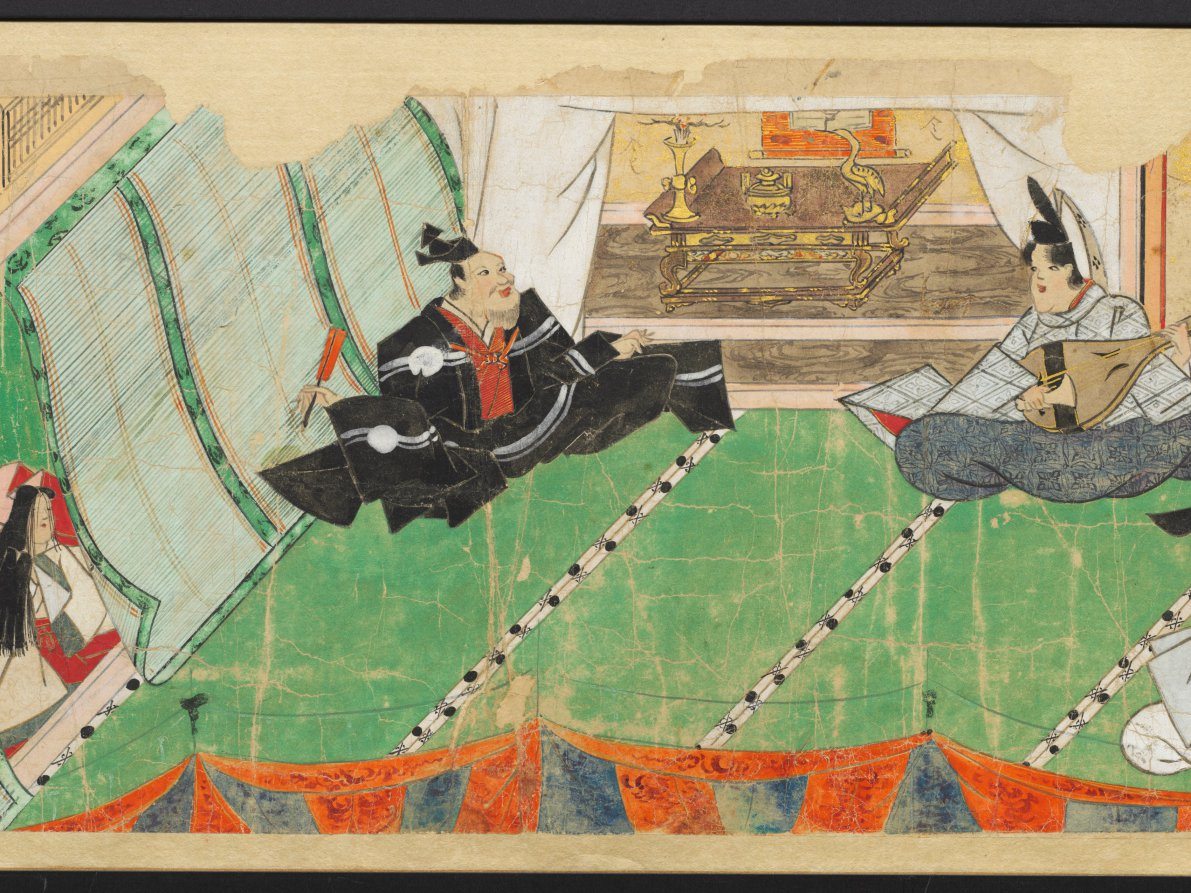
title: The Saltmaker's Story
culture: Japan, Edo period (1615–1868)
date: early 1600s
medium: One of a pair of handscrolls; ink, color, and gold on paper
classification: Painting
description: Once read and copied by girls at New Year’s celebrations and included in dowries, The Saltmaker’s Story is a rags-to-riches tale in which daughters are gifts from the gods. Despite his simple outlook, the main character progresses from humble roots as an associate at Kashima Shrine to the elite status of grandfather of the emperor through the intervention of the Kashima deity. The Saltmaker’s Story is traditionally presented in a set of three scrolls, but the text of this set has been removed by a previous owner, who remounted the illustrations as a pair. The paintings of this one take us from right to left through the second half of the tale.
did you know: This handscroll originally had texts before its paintings, but the texts were removed.